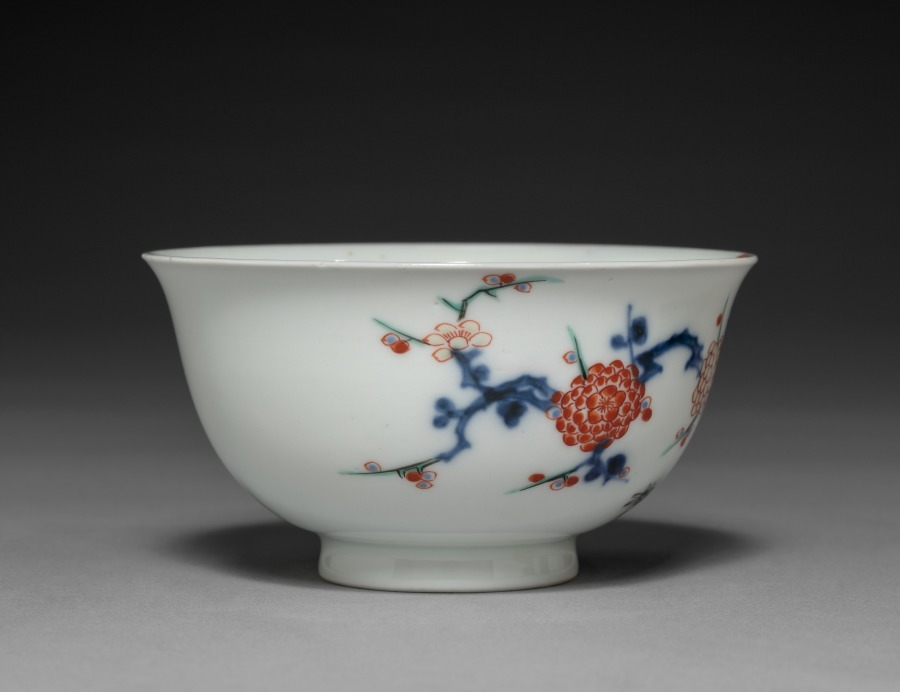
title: Cup with Plum and Rock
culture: Japan, Edo period (1615–1868)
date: 1700s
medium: porcelain with underglaze blue and overglaze enamel decoration (Hizen ware, Ko-Kutani type)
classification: Ceramic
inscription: 福